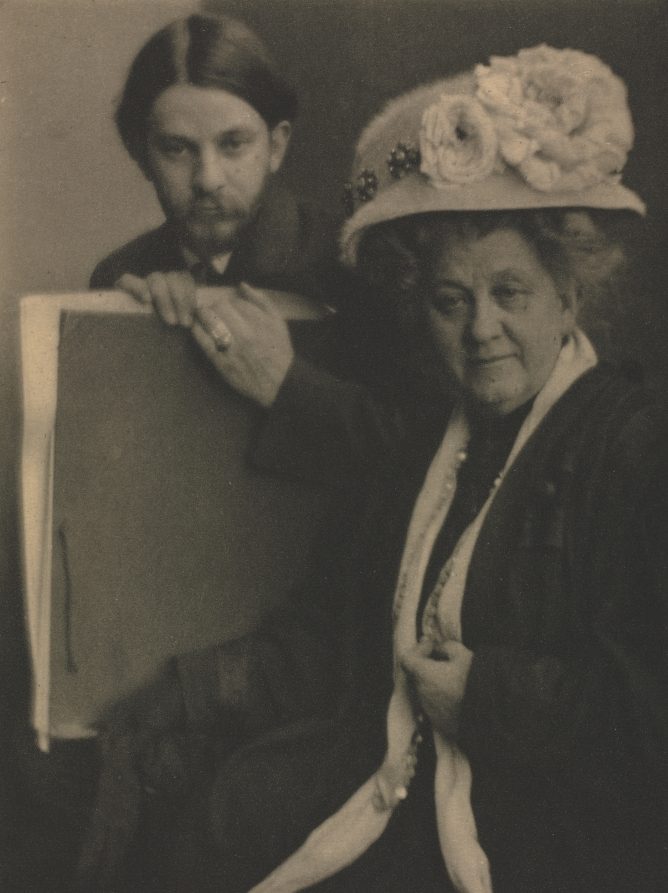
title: Camera Work: Alvin Langdon Coburn and His Mother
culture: America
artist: Clarence H. White (American, 1871–1925)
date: 1910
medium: photogravure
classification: Bound Volume